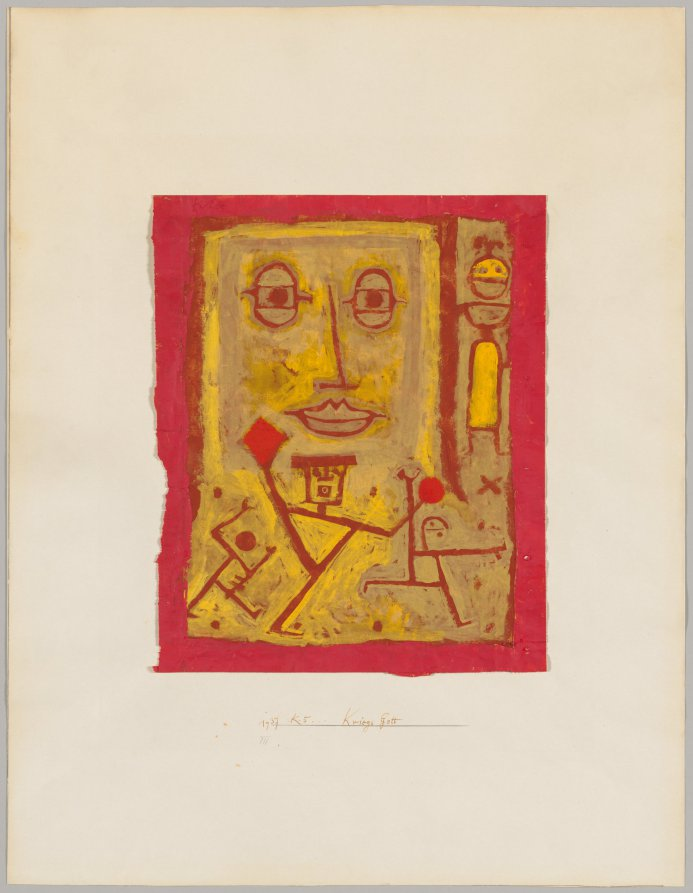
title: God of War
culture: Germany, 20th century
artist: Paul Klee (German, 1879–1940)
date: 1937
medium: Gouache and tempera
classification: Drawing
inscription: signed, upper left, in paint: Klee; secondary support, by artist, lower center, in brown ink: 1937 K. 5. Kriegs Gott ["37 K. 5. Kriegs Gott" underlined in graphite]; lower center, in graphite: III; verso of secondary support, upper left, in graphite: Nos 39 31 / 35 x 29 [all circled]; upper left, on separately applied label: [upper portion cropped] / 1937 [inscribed in blue ink] No [printed in black ink] 0843 [stamped in blue ink] / Paul Klee / Dieu de la Guerre / 35 x 29 [last three lines inscribed in blue ink] / Photo No [printed in black ink]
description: This drawing belongs to a series of large format works with bold colors, thick painterly lines, and pictograph formations that Paul Klee created late in his career. The period during which they were made was marked by anxiety for the artist, as political turmoil grew in Europe during the 1930s. To suggest this experience, Klee painted on a sheet of newspaper, allowing the printed text to intermingle with his own sign-like marks. The article visible here, for example, discusses the Spanish civil war. The figures that dominate the work more subtly suggest this crisis, including a large face with heavy eyelids and an enigmatic smile depicted in layers of yellow paint and several dancing or running figures in the foreground delineated by areas left unpainted.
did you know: Shortly before this drawing was made, Paul Klee was exiled from Germany to his native Switzerland due to the political turmoil that led to World War II.